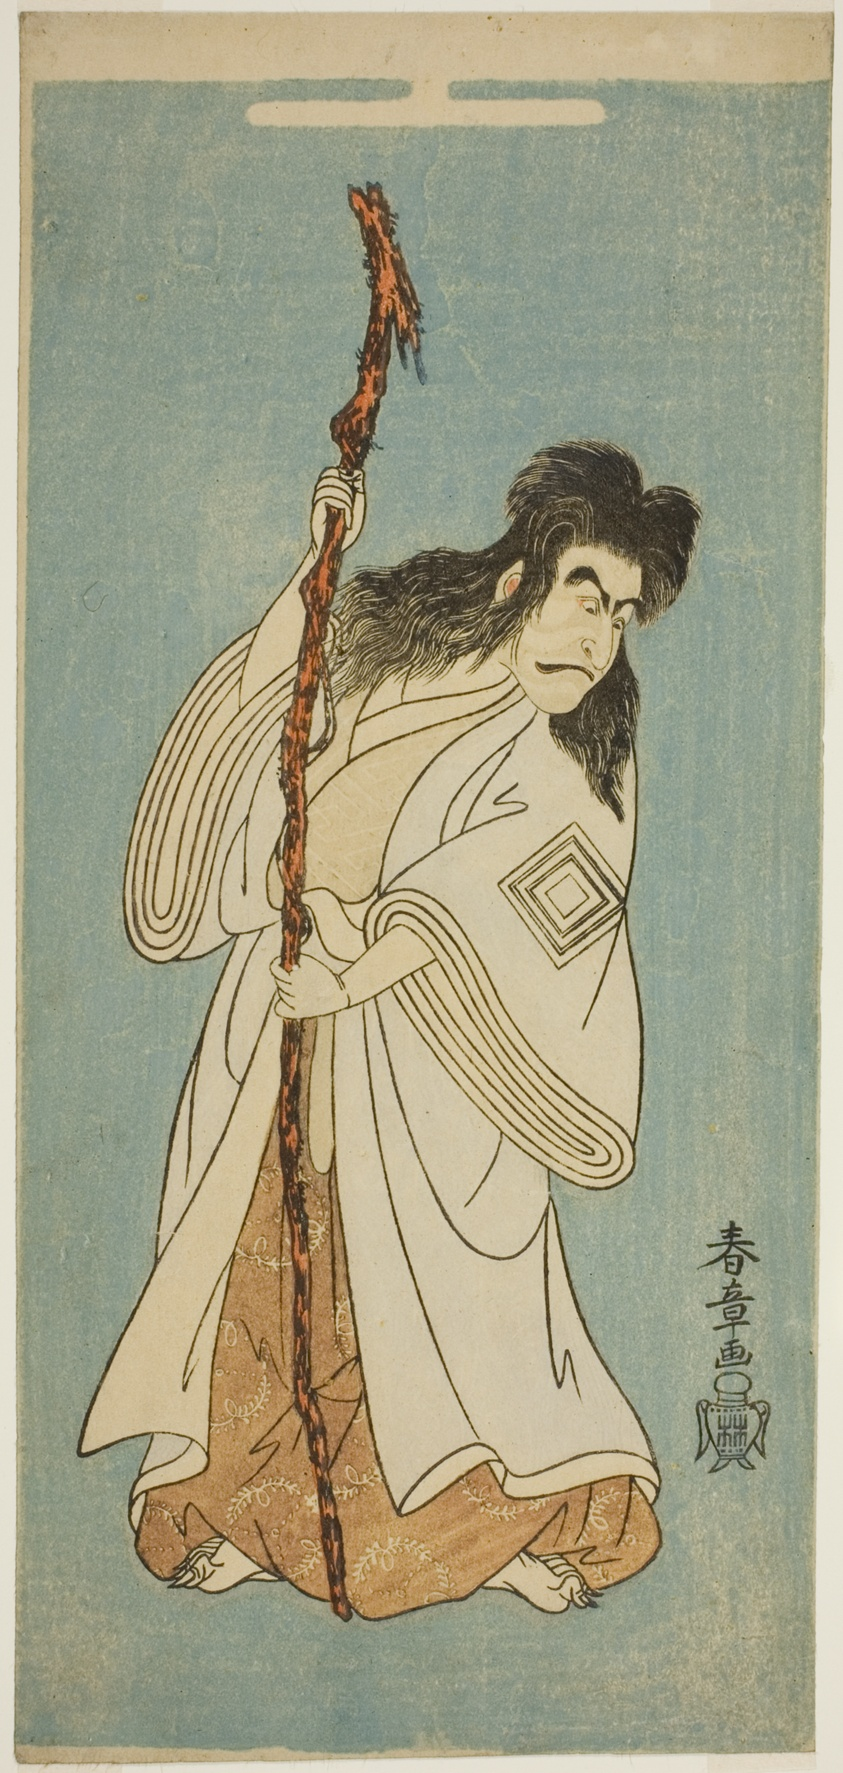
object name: Print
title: The Actor Ichikawa Danjuro IV possibly as Tenjiku Tokubei in the play "Tenjiku Tokubei Turns the Helm toward Home (Tenjiku Tokubei Kokyo no Torikaji)," performed at the Nakamura Theater in the eighth month, 1768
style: Japanese (culture or style)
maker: Katsukawa Shunsho 勝川 春章; Japanese, 1726-1792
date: c. 1768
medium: Color woodblock print; hosoban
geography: Japan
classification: woodblock print; print; asian art